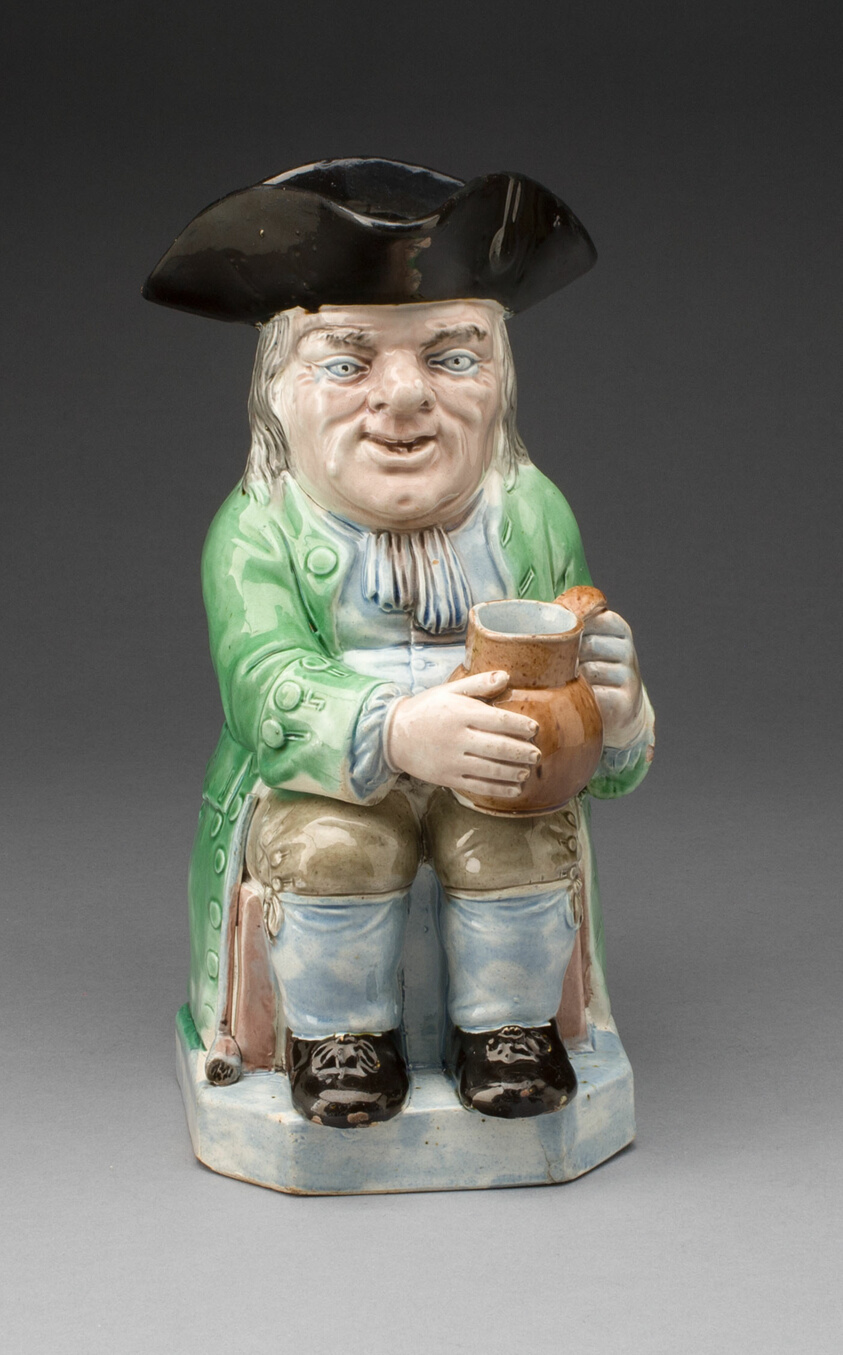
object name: Ceramics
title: Toby Jug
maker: England, Staffordshire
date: 1780/90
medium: Lead-glazed earthenware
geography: Staffordshire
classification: earthenware; european decorative arts; lead-glazed earthenware; ceramics